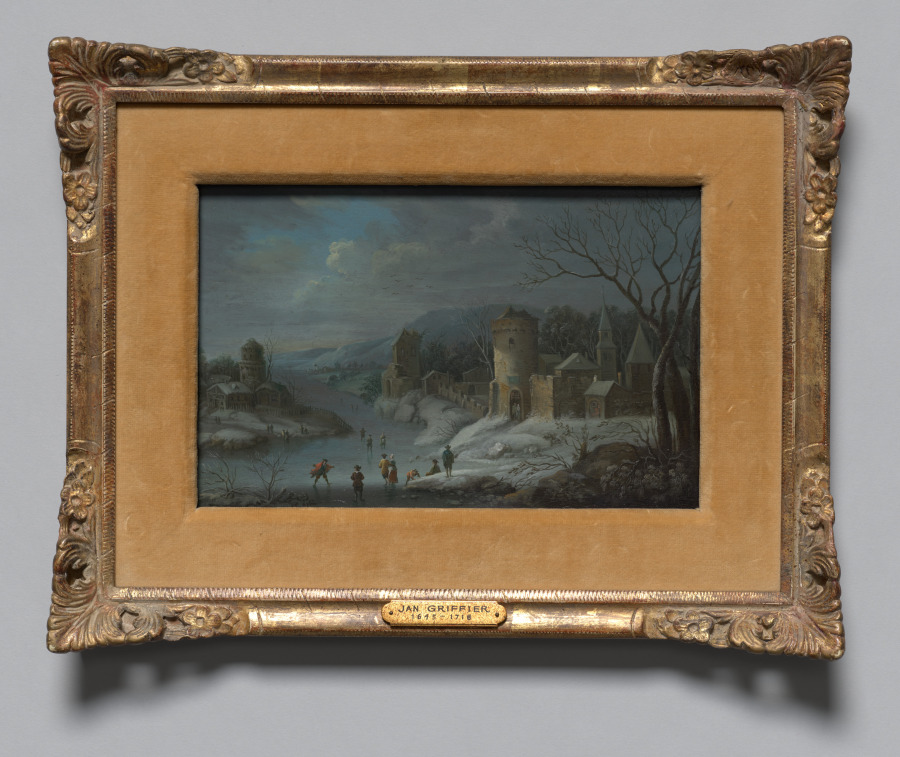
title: Winter Landscape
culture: Netherlands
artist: attributed to Jan Griffier (Dutch, 1648–1718)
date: c. 1680–1718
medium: oil on copper, mounted on wood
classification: Painting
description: A number of scholars have questioned the attribution because Griffier did not generally paint on copper and primarily painted hunting scenes. It may be based on a print, although the source has yet to be identified.